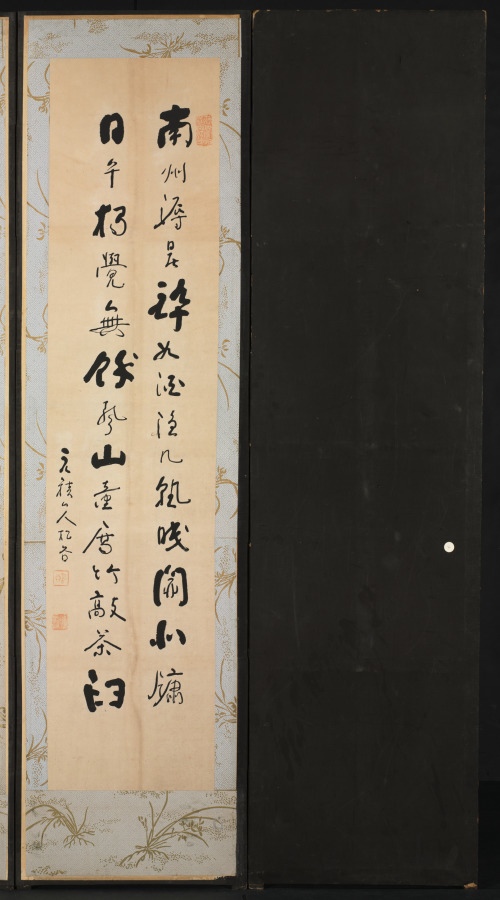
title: Calligraphy (reverse)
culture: Korea, Joseon dynasty (1392–1910)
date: late 1800s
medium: Ten-panel folding screen affixed with album leaves (obverse), calligraphy (reverse), ink and color on silk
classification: Painting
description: The front of this screen features an assortment of subjects: birds and flowers, landscapes, and scenes of everyday life, mostly in monochromatic ink with light colors. The screen’s reverse side conveys a number of classical poems about the fleeting beauty of the four seasons. Traditionally, only one side of a folding screen bears painted or embroidered images, since these were used as a background furnishing. In Korean houses by the 1800s and early 1900s, however, two-sided folding screens became noticeably popular, possibly inspired by Japanese double-sided folding screens, which mainly served as room dividers in Japanese households.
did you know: A calligrapher has brushed several Chinese poems about the four seasons on the reverse side, among them "Composing in the Daytime of Summer" by Tang poet Liu Zongyuan (773–819) and "Composing when Spring Begins" by Song scholar Zhang Shi (1133–1180).